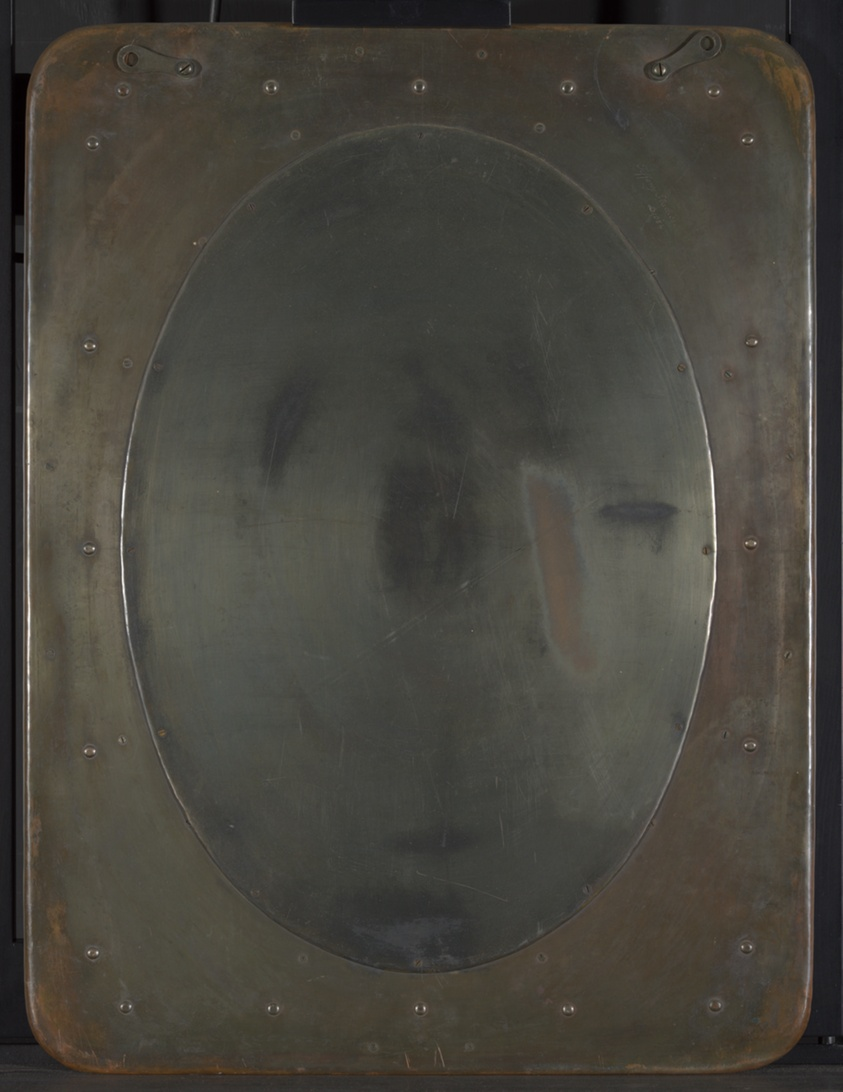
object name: Furnishings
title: Mirror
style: Arts and Crafts Movement, 20th Century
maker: Possibly designed by Clara Pierce Wolcott Driscoll (American, 1861–1944); and/or Joseph Briggs (American, born England, 1873–1937); Tiffany Glass and Decorating Company (American, 1894–1902); or Tiffany Studios (American, 1902–32); Corona, New York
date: c. 1901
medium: Favrile glass, mirrored glass, and bronze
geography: Corona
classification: flat mirrors; american decorative arts; decorative arts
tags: lotus, reflections, swirl motifs